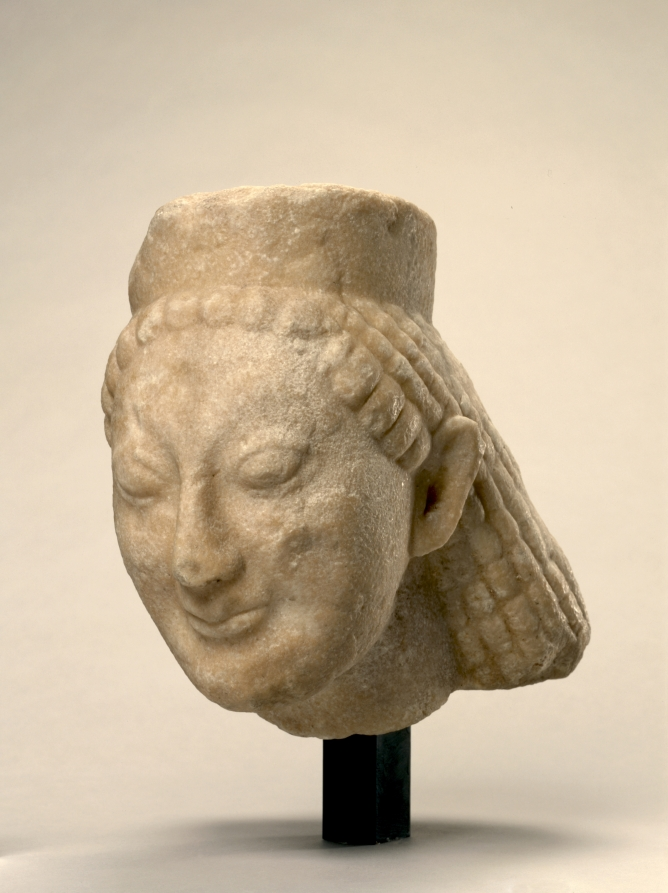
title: Head of a Sphinx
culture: Greece, Archaic period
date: 540–520 BCE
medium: marble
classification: Sculpture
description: This female head once belonged to a sphinx, a mythological hybrid creature with the head of a woman and body of a winged lion. Her short cylindrical crown, known as a polos, helps to identify her as a sphinx, as does the slope of her hair and neck, which once continued onto a feline body. Also common in ancient Egyptian and Near Eastern art (though more often in male form), the sphinx is best known in Greek mythology for devouring passersby who could not answer her riddle outside the Boiotian city of Thebes. Stone sphinxes like this one served as both votive offerings and grave monuments in Archaic Greece.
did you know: Greek sphinxes were often placed on top of columns or grave stelai as guardian figures.